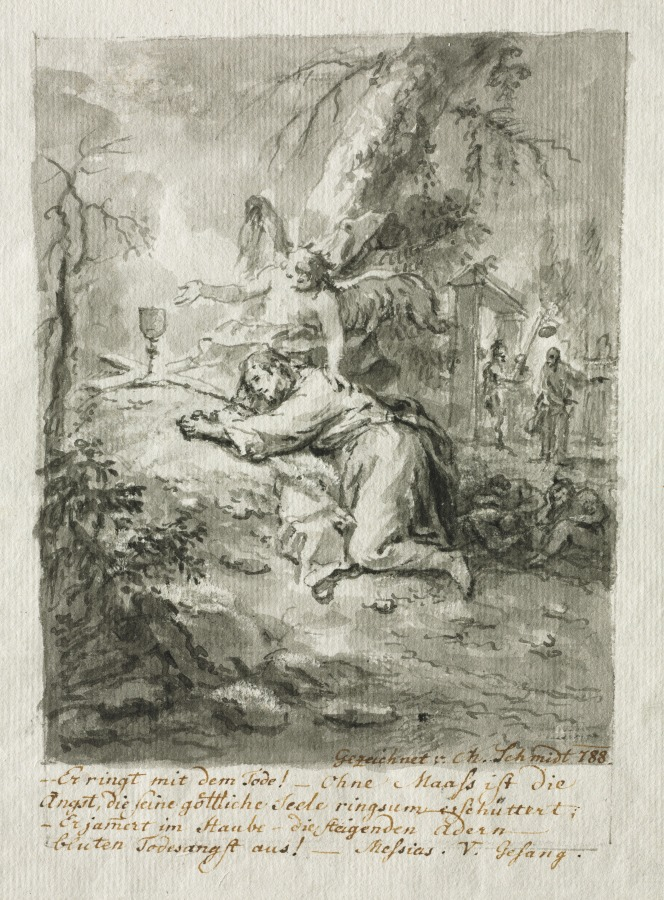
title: Christ on the Mount of Olives, The Flagellation, Christ Crowned with Thorns, The Crucifixion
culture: Germany, 18th century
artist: Martin Johann Schmidt (Austrian, 1718–1801)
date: 1788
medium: brush and gray ink and gray wash with black chalk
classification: Drawing